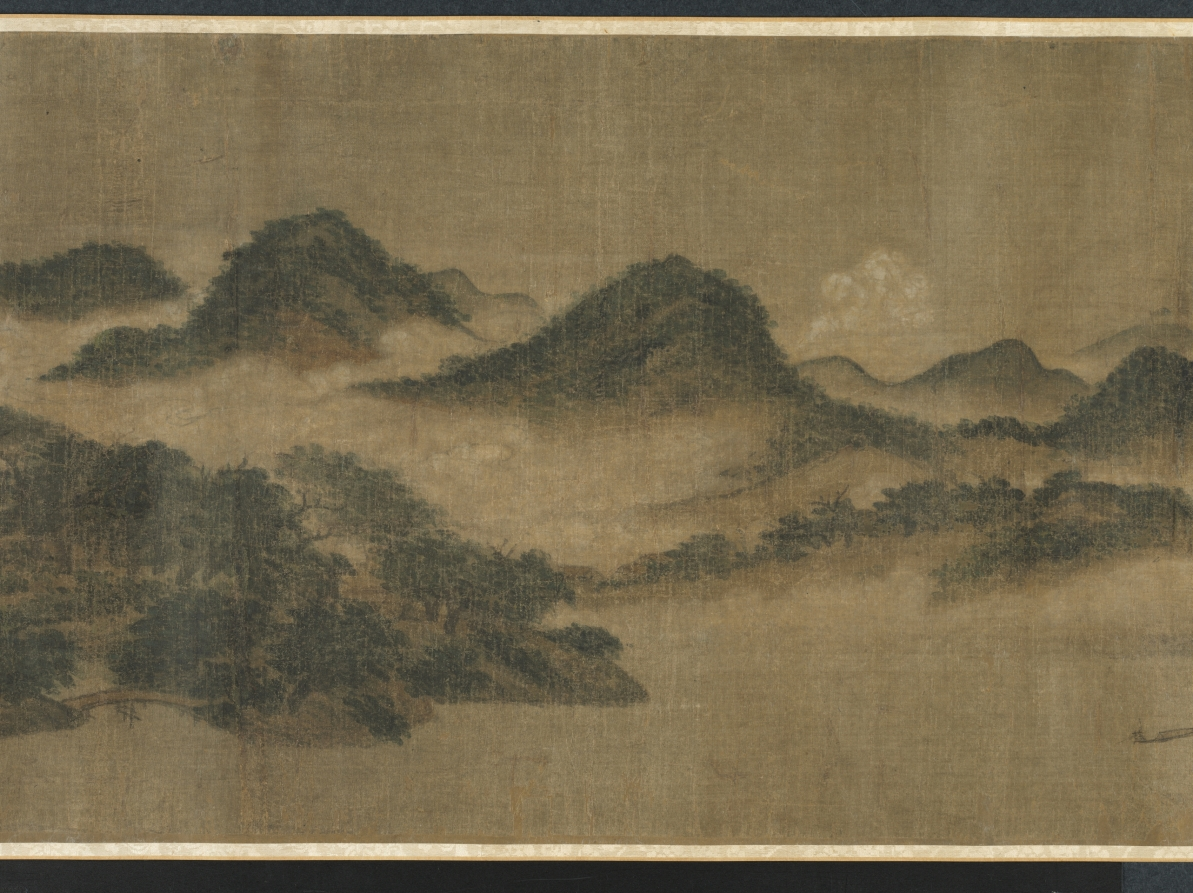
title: Cloudy Mountains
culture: China, Southern Song dynasty (1127-1279)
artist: Mi Youren (Chinese, 1072–1151)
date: 1130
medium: Handscroll; ink and color on silk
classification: Painting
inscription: 好山無數接天涯，烟靄陰晴日夕佳。/ 要識先生會到此，故留筆戲在君家。/ 庚戍歲，辟地新昌作。元暉。/ [seal] 元暉戲作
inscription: [Seal] 安陽孫氏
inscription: [Seal] 畢瀧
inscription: [Seal] 成親王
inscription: [Seal] 永瑆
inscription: [Seal] 錫三 appears twice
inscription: [Seal] 養性齋珍藏書畫印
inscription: [Seal] 芷陔審定真跡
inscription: [Seal] 玉簡齋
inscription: 2 colophons (1 dated 1650), inscription dated 1647, and 2 seals of Wang To (1592–1652)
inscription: 1 colophon, dated second month of the gengyin year 庚寅 (1650), and 2 seals of Chen Kuang 陳爌 (1646 jinshi degree)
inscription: 7 seals unidentified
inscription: A separate scroll containing six colophons on Cloudy Mountains exists; the inscribers are Luo Zhenyu 羅振玉 (1866–1940), Naito Torajiro 內藤虎次郎 (1866–1934), Nagao Ko 長尾甲 (1864–1942), and Wu Changshuo 吳昌碩 (1844–1927). Naito Torajiro alone wrote three colophons.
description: Cloudy Mountains captures the view of a lush and misty riverscape, an impression of Mi Youren’s new environment, painted in a moment of peace. With the fall of the Northern Song dynasty in 1127 upon the Jurchen’s military invasion, Mi Youren fled south across the Yangzi River. In 1130, he had reached Xinchang in Zhejiang province and thanked his host with this painting for having given him shelter. Mi Youren was the oldest son of the art critic Mi Fu (1051– 1107); both developed a distinct style of mountain scenery by accumulating wet ink dots that create a hazy atmosphere.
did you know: This scroll is one of the museum’s earliest dated Chinese paintings.